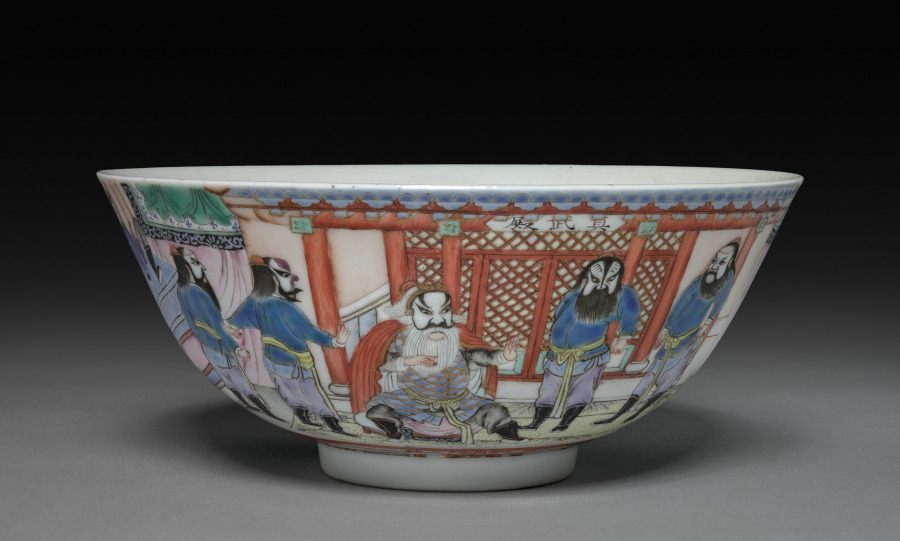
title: Five-color Bowl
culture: China, Qing dynasty (1644-1911), Daoguang reign (1821-1850)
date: 1821–1850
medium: porcelain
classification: Ceramic